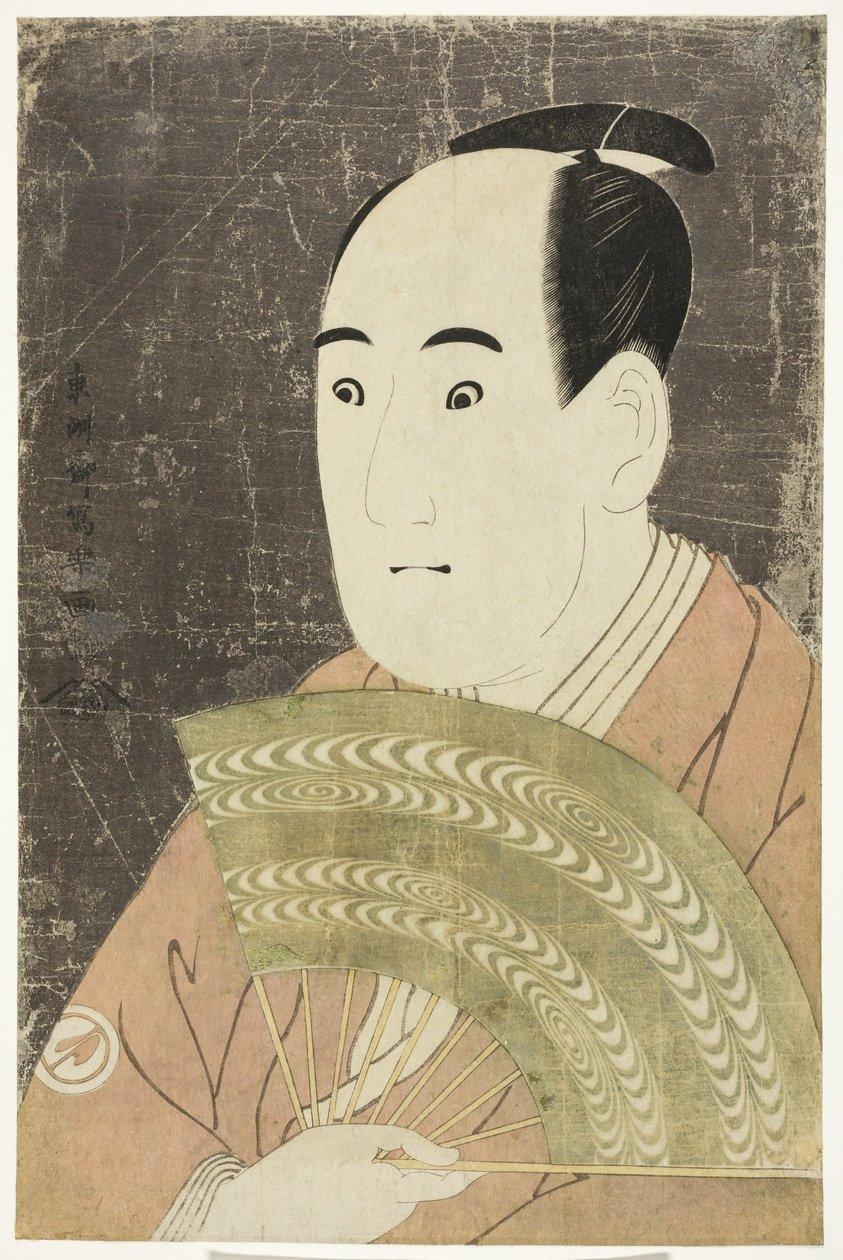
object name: Print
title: The actor Sawamura Sojuro III as Ogishi Kurando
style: Japanese (culture or style)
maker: Toshusai Sharaku 東洲斎 写楽; Japanese, active 1794-95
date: 1794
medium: Color woodblock print; oban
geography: Japan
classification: woodblock print; print; asian art